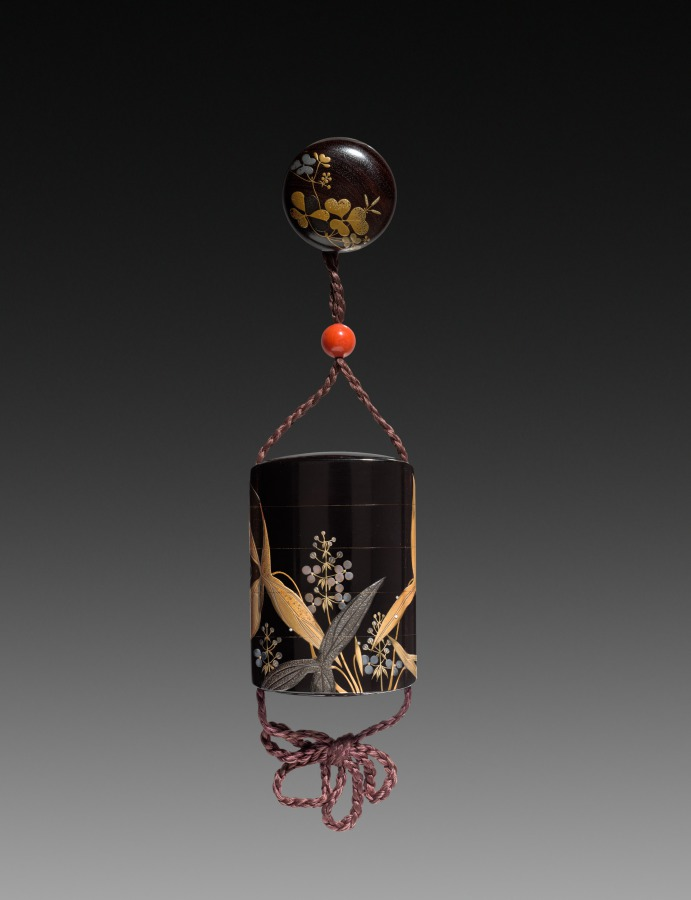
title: Inro, Ojime, Netsuke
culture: Japan, Edo period (1615–1868) to Meiji period (1868–1912)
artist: Shibata Zeshin (Japanese, 1807–1891)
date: later 1800s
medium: lacquer with sprinkled gold, silver, and mother-of-pearl design, coral, and wood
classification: Lacquer